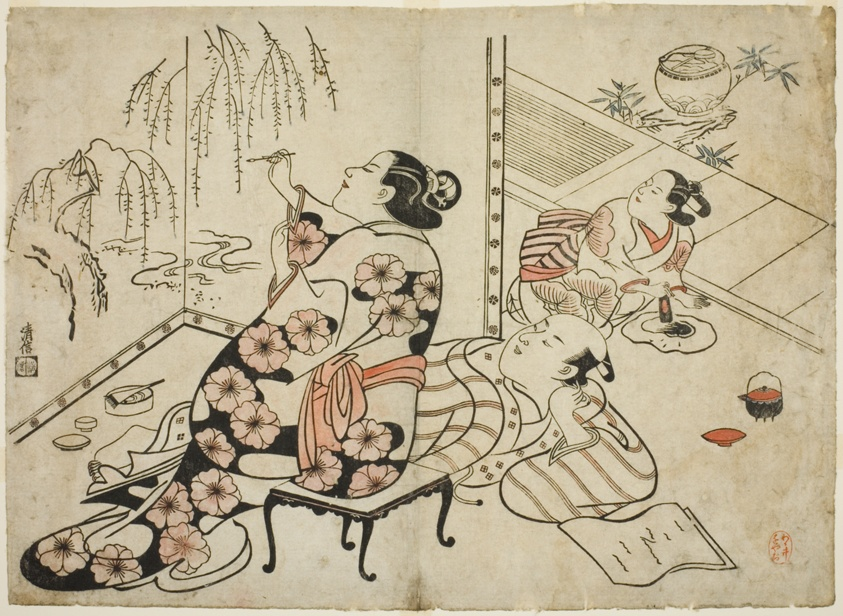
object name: Print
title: Courtesan Painting a Screen, from a series of 12 erotic prints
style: Japanese (culture or style)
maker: Torii Kiyonobu I (Japanese, 1664-1729)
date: c. 1711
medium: Hand-colored woodblock print; oban, sumizuri-e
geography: Japan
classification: woodblock print; print; asian art